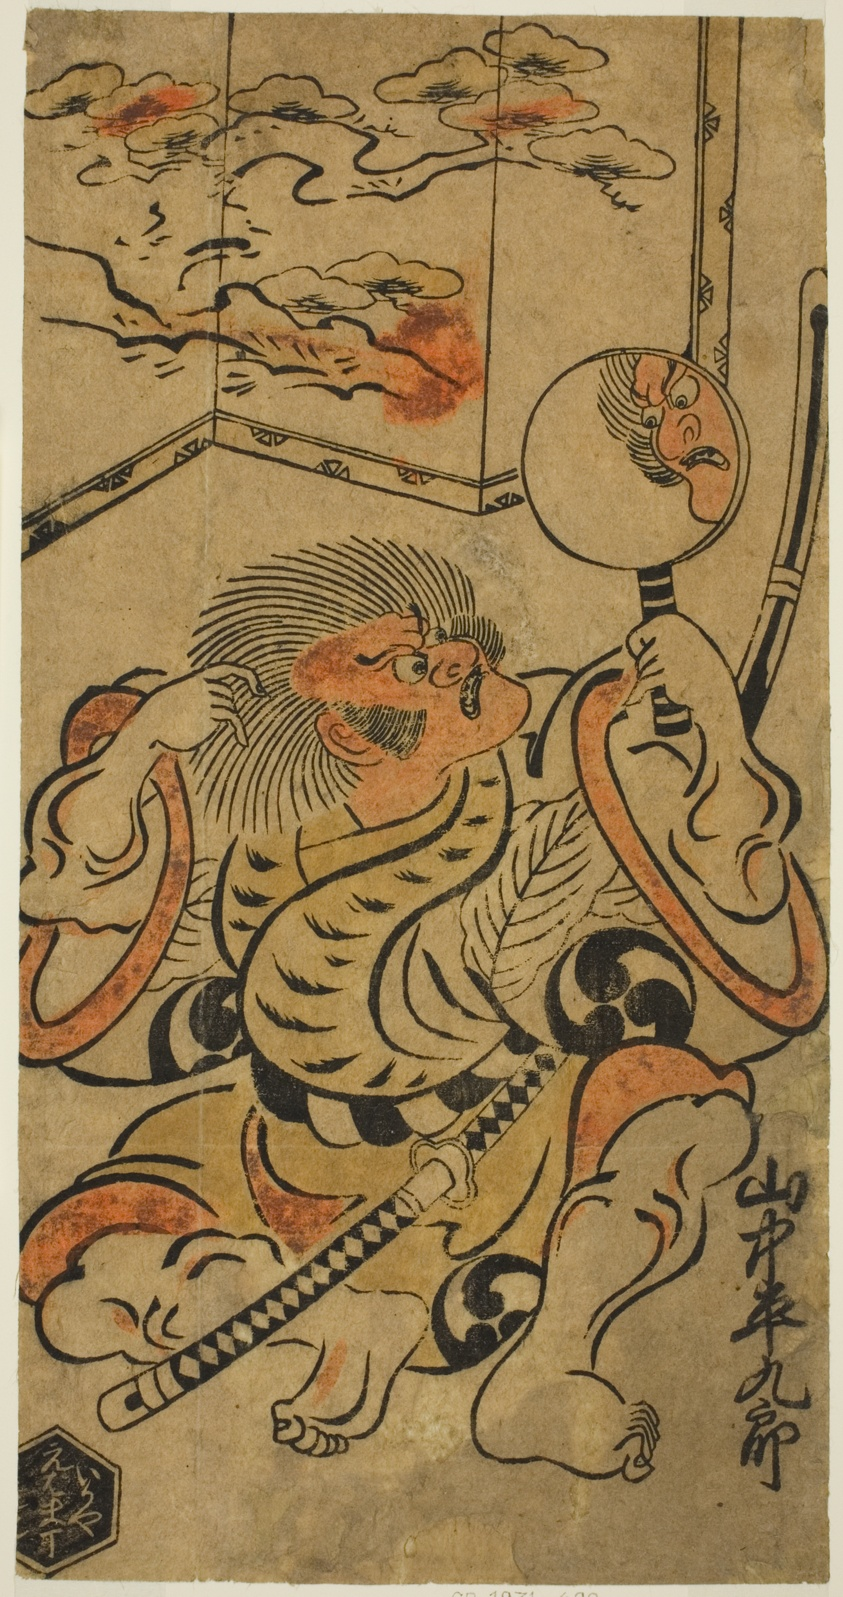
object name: Print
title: The Actor Yamanaka Heikuro I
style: Japanese (culture or style)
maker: Attributed to Torii Kiyonobu I; Japanese, 18th century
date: c. 1705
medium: Hand-colored woodblock print; hosoban, tan-e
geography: Japan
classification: woodblock print; print; asian art